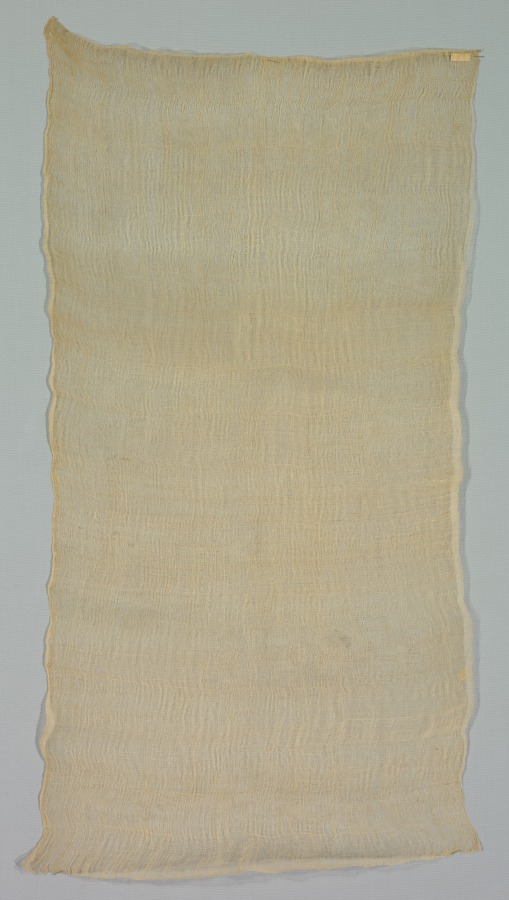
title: Maguey Cloth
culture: Mexico, early 20th century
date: early 1900s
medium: cactus fiber (Maguey plant)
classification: Textile